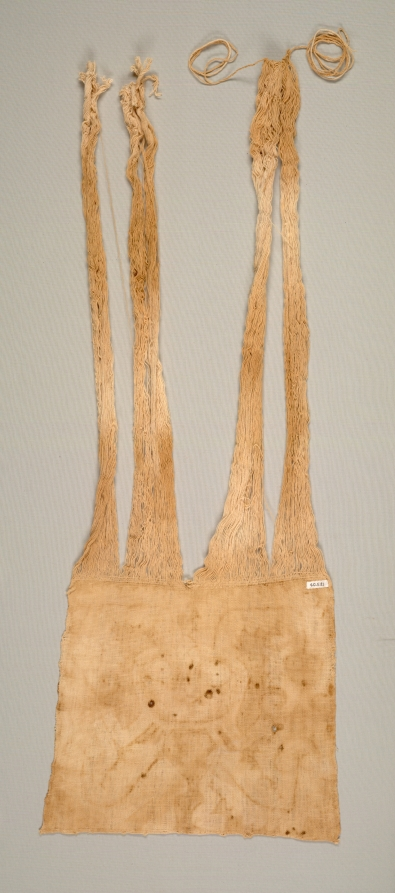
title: Mummy Bundle "Mask"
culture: Peru, South Coast, Ica Valley, Ocucaje site, Paracas style (700 BCE–1 CE)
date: 400–200 BCE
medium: cotton and pigment, plain weave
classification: Textile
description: The Paracas people buried their dead in bundles that they created by carefully wrapping the seated human body in layers of garments and other textiles. In some cases, they placed a painted cloth—such as these examples—on the outer layer and at the top of the bundle. The hair-like yarns (unwoven warps) were arranged around a solid cotton disk that was sometimes wrapped with a headband. The cloths, then, seem to have functioned as the bundle’s head, even though some are painted not with faces but with complete figures whose supernatural character is marked by the appendages streaming from their bodies.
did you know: These masks fall into two categories, those with only a face and those with a full-bodied figure.